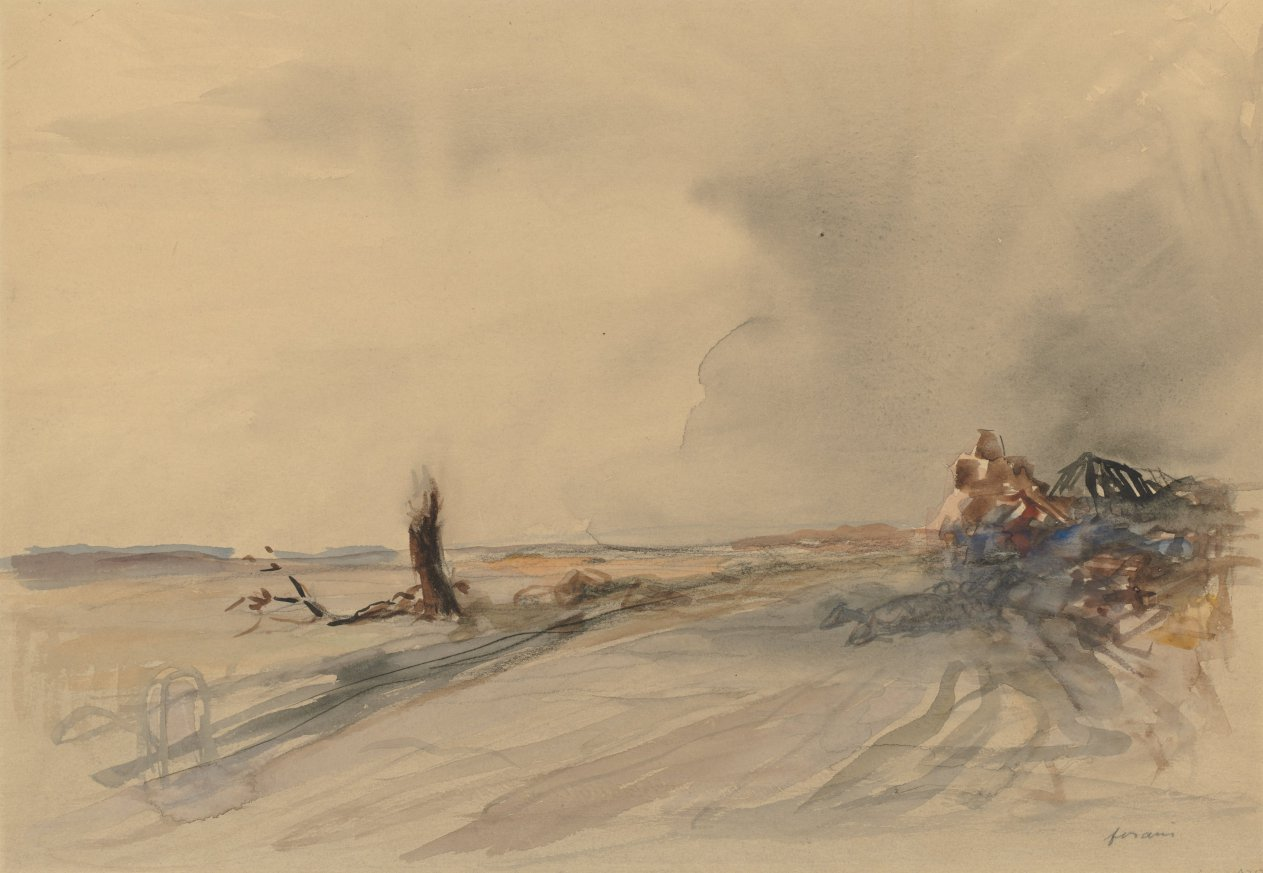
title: Devastated Land (recto)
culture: France, 20th century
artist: Jean Louis Forain (French, 1852–1931)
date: c. 1919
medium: gray wash, watercolor, and gouache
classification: Drawing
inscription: signed, lower right, in graphite: forain ; lower right, in graphite: A2175